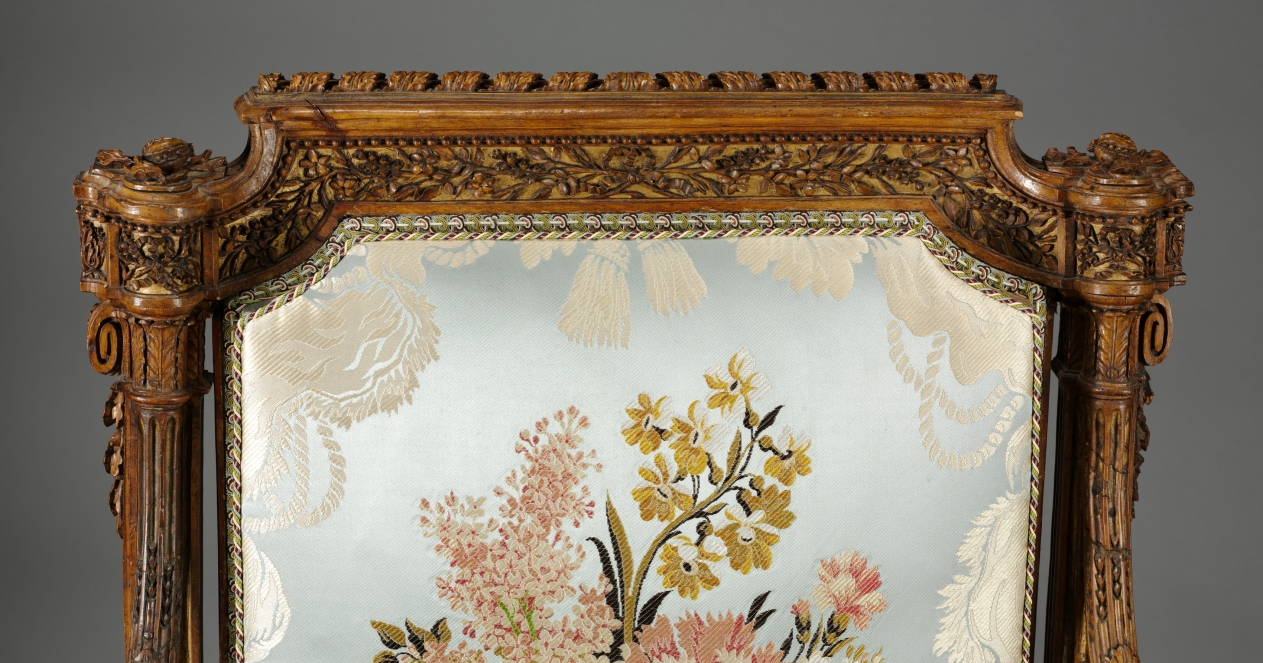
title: Armchair (Fauteuil) (2 of 2)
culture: France, 18th century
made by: Nicolas-Denis Delaisement (French)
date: c. 1785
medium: boxwood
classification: Furniture and woodwork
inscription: signed on front and back of frame of seat underneath: Delaisement with inverted "s."